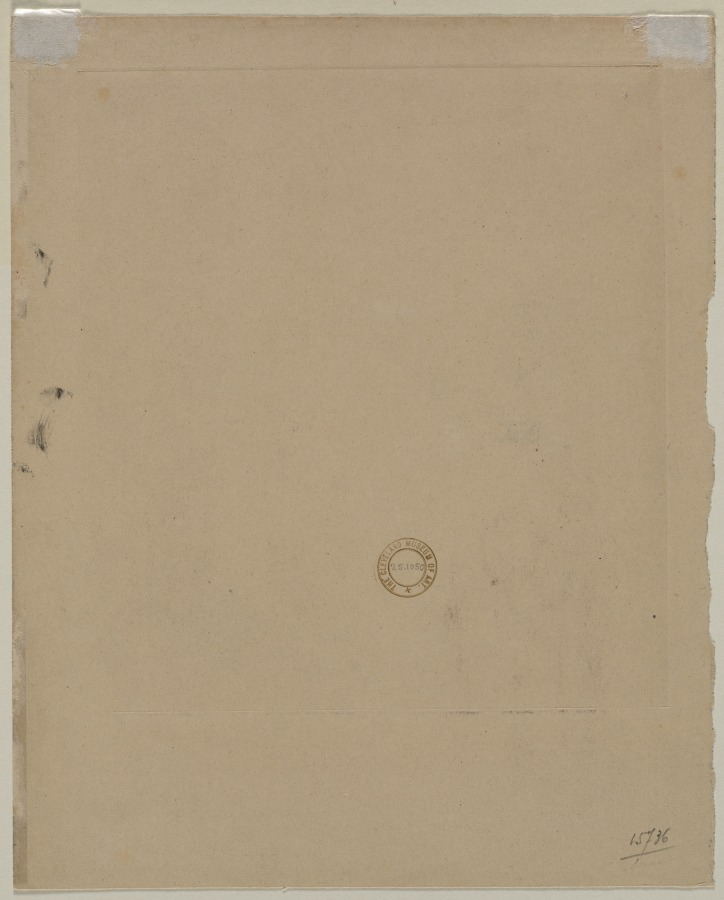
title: At the Market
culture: France, 19th century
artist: Camille Pissarro (French, 1830–1903)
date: late 1800s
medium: monotype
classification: Print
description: Pissarro probably learned the technique of monotype from his friend Edgar Degas. Although it allowed him to work in a spontaneous and expressive way, the medium never played a significant role in his work.